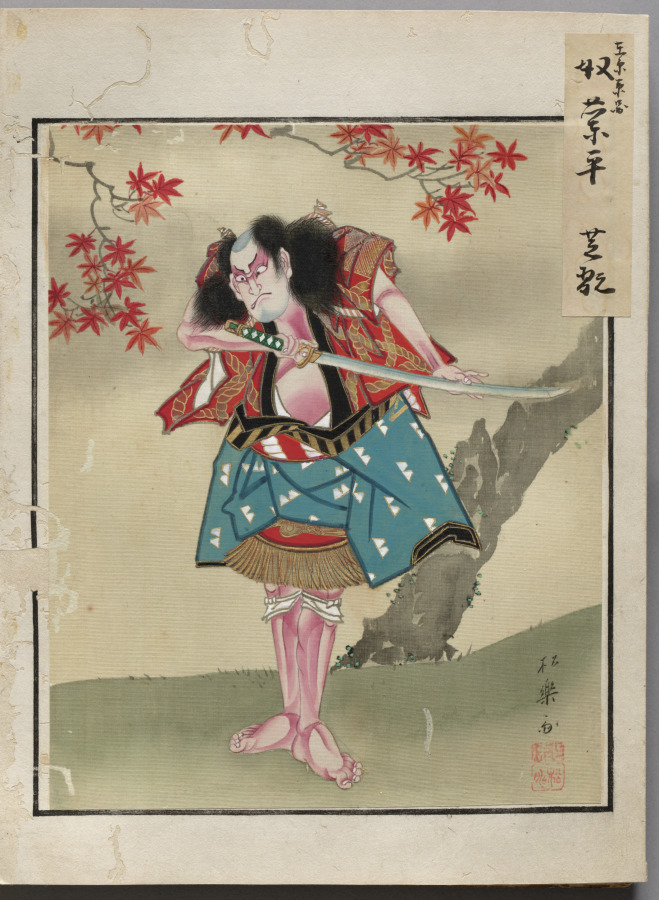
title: Double-Leaf from Album of Actor Portraits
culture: Japan, Edo period (1615–1868)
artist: Shōrakusai (Japanese)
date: c. 1790–1810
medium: double-leaf from an accordion-style album; ink and color on silk (right)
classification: Painting